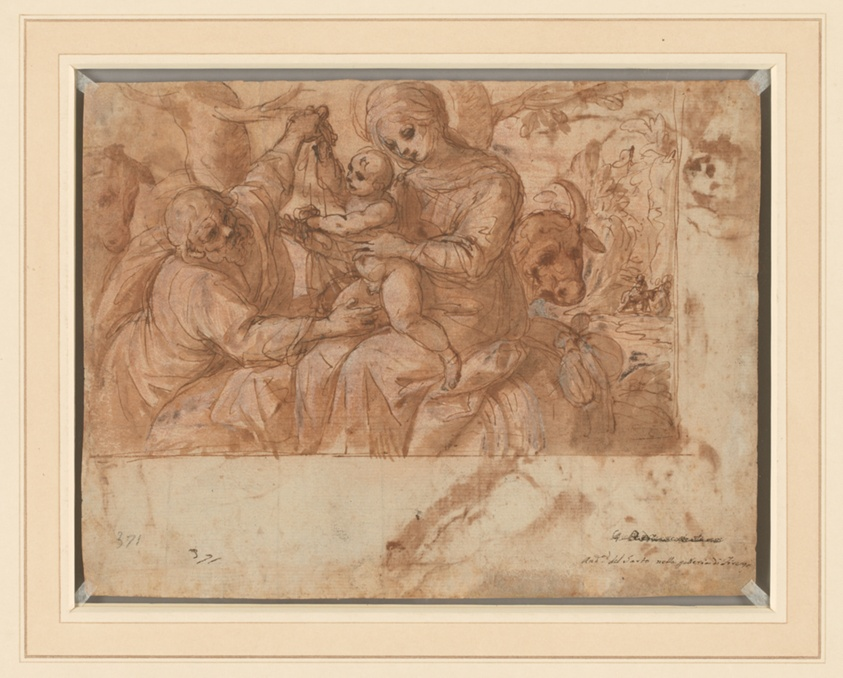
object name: Drawing and Watercolor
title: Studies of a Figure Bending Over, Two Putti, and an Arm (recto); Rest on the Flight into Egypt (verso)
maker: Cesare Rossetti (Italian, active c. 1593–1623/42)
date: 1596/97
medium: Pen and brown iron-gall ink, with brush and brown wash, over black chalk (recto), and pen and brown iron-gall ink, with brush and brown wash, over touches of black chalk, heightened with lead white gouache (partially oxidized) (verso), on ivory laid paper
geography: Italy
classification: drawings (visual works); paper; prints and drawing